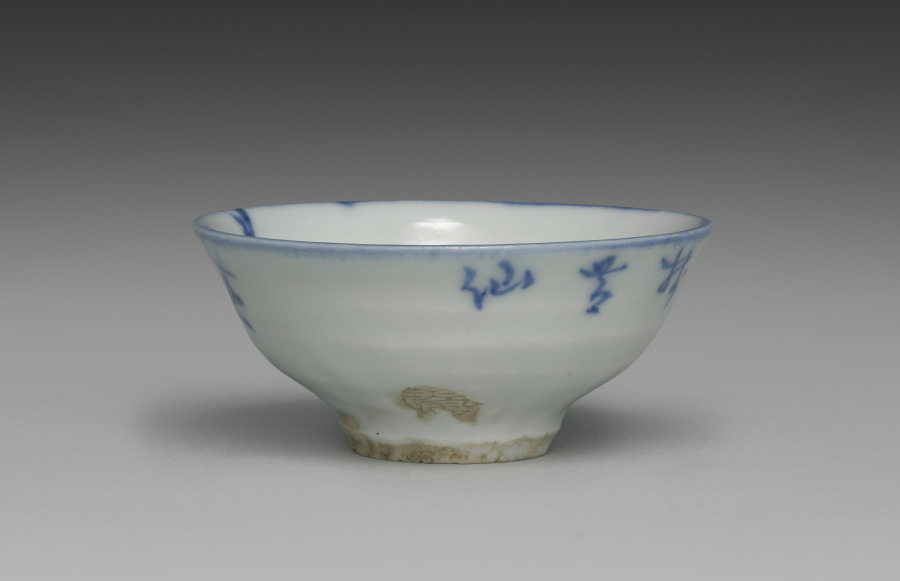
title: Sake Cup with Auspicious Plants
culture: Japan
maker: Seifū Yohei II (Japanese, 1844–1878)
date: 1861–78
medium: One of a pair of sake cups; porcelain with underglaze blue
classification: Ceramic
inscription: 松梅芝仙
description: Seifū Yohei II excelled as a painter, as evidenced by his floral and landscape designs. His works were selected as the best among Kyoto ceramics shown to jurists from Europe and the US, thus paving the way for international recognition of the studio in the late 1800s.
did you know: The plum and the pine are two of the "Three Friends of Winter," auspicious symbols of a cultured scholar's virtues: steadfastness, resilience, and flexibility.